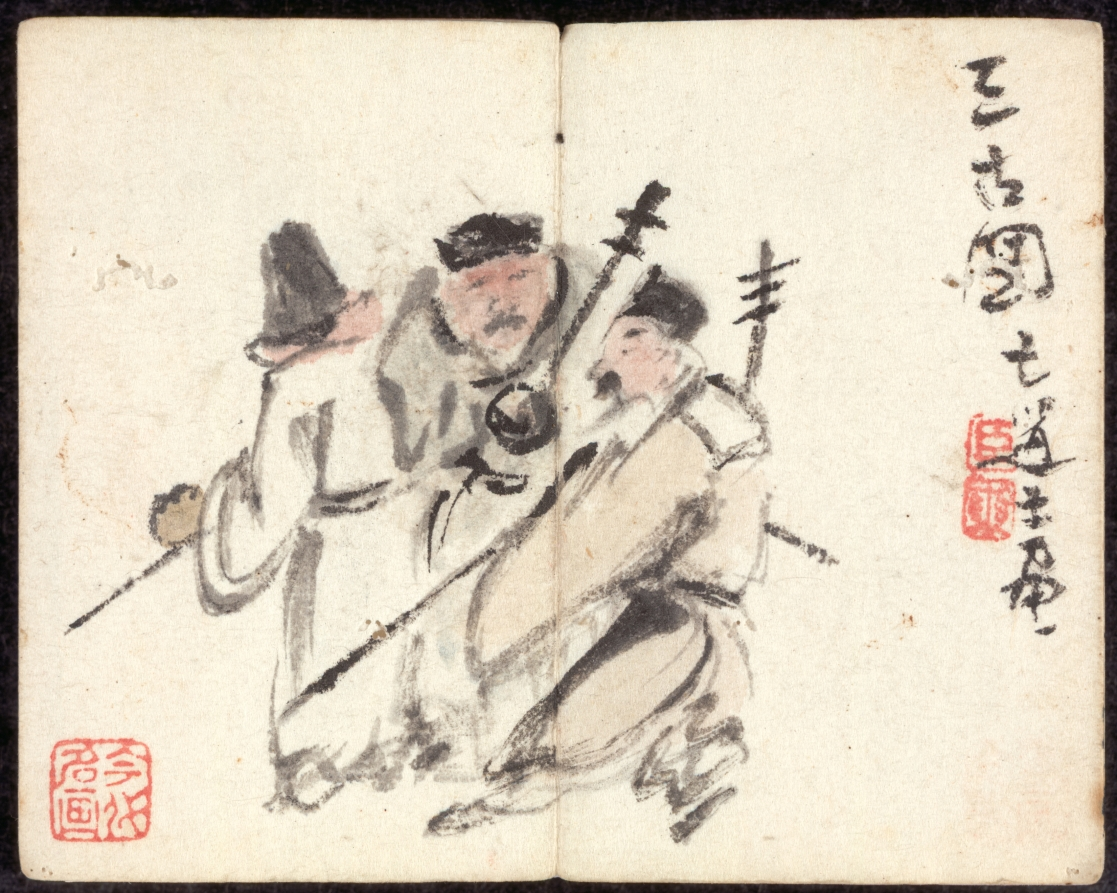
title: Miniature Album with Figures and Landscape (Three Men)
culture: China, Qing dynasty (1644–1911), Qianlong reign (1736–95)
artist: Zeng Yandong (Chinese, c. 1751–1827)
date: 1822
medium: album leaf, ink and color on paper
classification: Painting